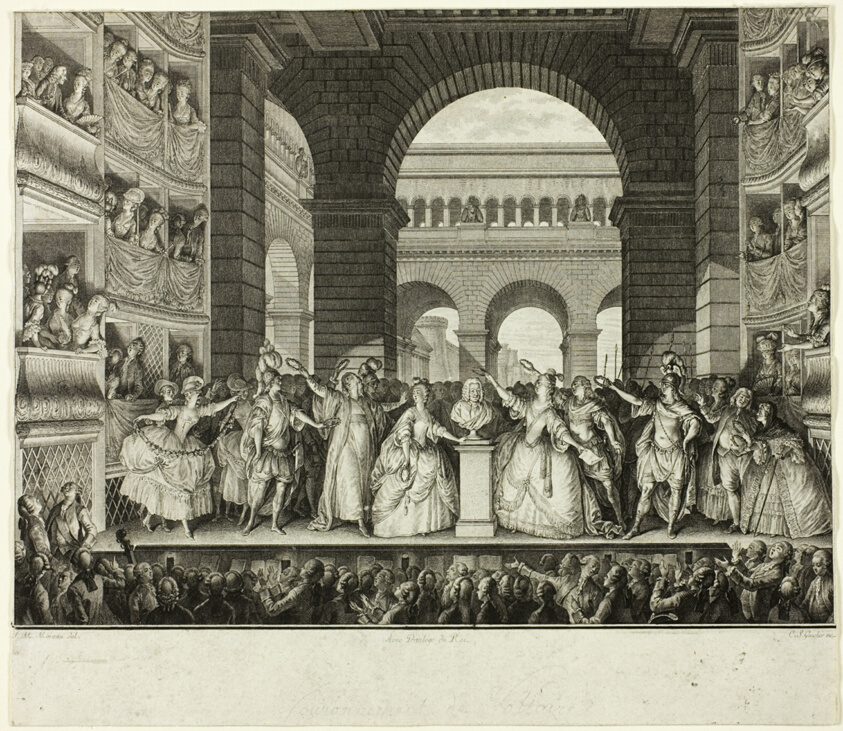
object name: Print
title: Crowning of Voltaire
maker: Charles-Etienne Gaucher (French, 1741-1804); after Jean Michel Moreau (French, 1741-1814)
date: 1778–82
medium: Etching and engraving on paper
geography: France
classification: etching; print; prints and drawing